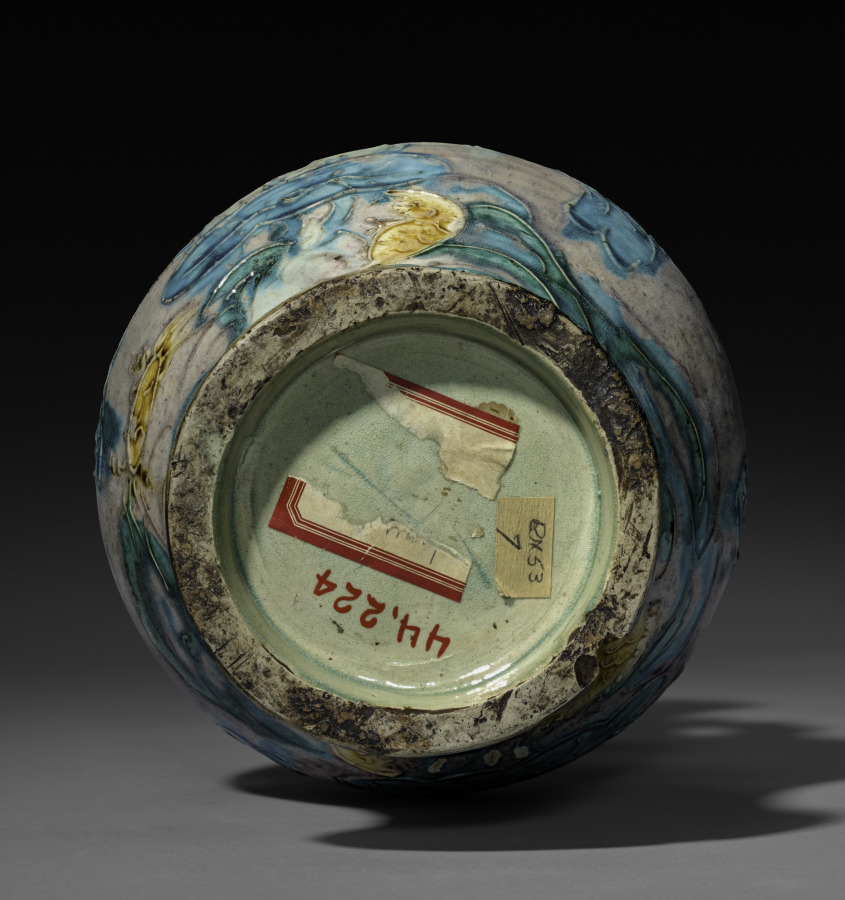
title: Beaker Vase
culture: China, Shanxi province, Ming dynasty (1368-1644)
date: 1368–1644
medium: Porcelain, Fahua ware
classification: Ceramic